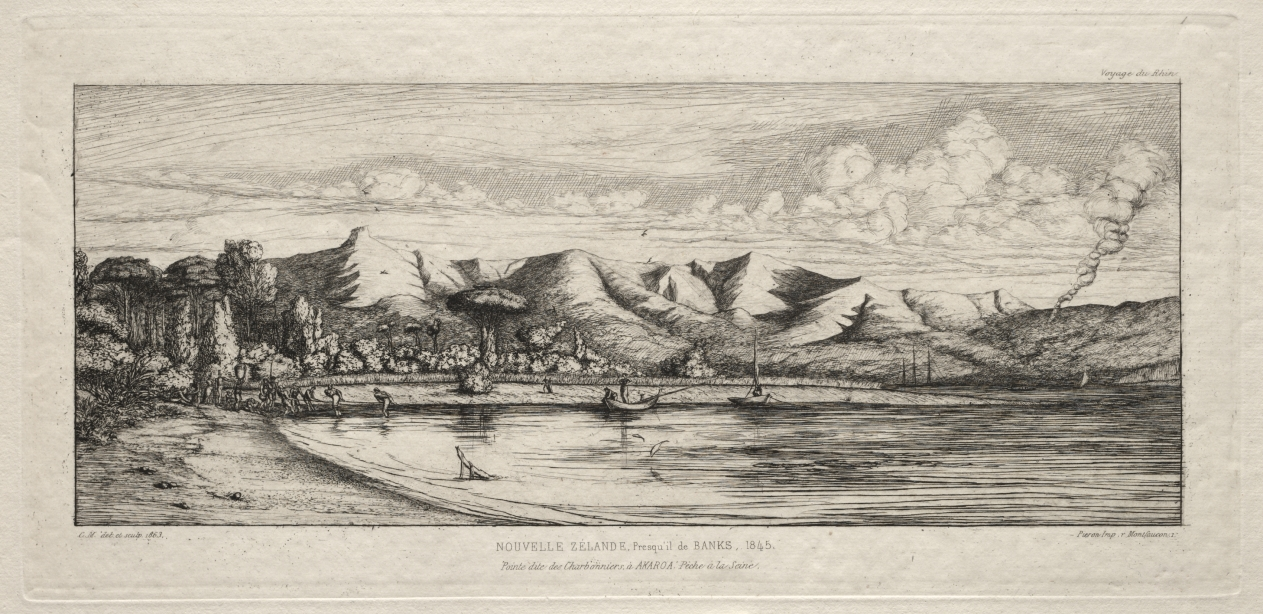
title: Seine Fishing off Charcoal Burners' Point, Akaroa, Banks' Peninsula, 1845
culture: France, 19th century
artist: Charles Meryon (French, 1821–1868)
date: 1863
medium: etching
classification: Print